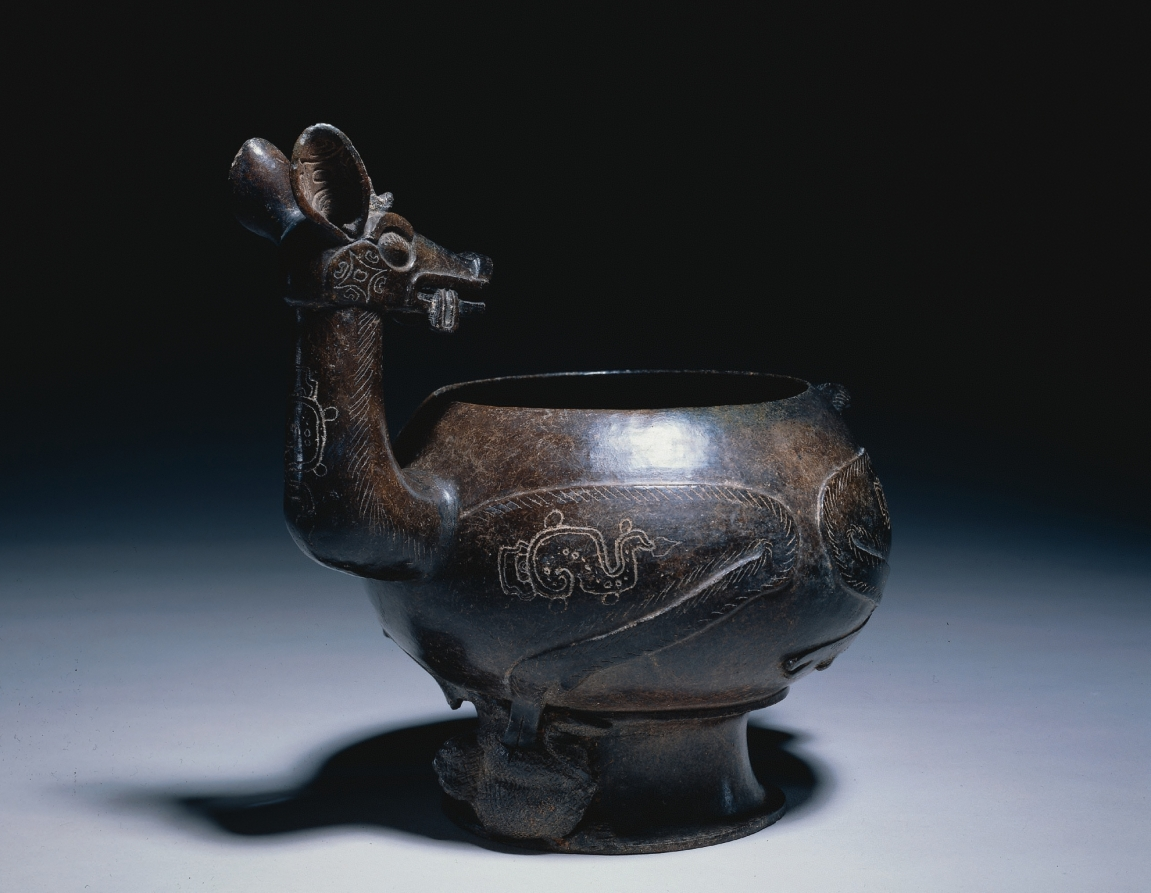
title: Deer Effigy Vessel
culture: Mesoamerica, Maya style, Classic Period (250-900)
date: 250–600 CE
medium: earthenware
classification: Ceramic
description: Maya artwork from the Early Classic Period (about AD 250-600) is dominated by three-dimensional sculpture in jade, stone, wood, and especially ceramic. This vessel is an exceptionally elegant example of Maya blackware, produced by firing earthenware pottery in a reducing (low oxygen) atmosphere. The deer is frequently depicted in Maya art, usually as a victim of either hunting or sacrifice. Venus signs and conch shells engraved on the deer also suggest death, for the planet Venus was regarded as a bringer of ill-fortune, and conch shell trumpets were carried by hunters. The small frog or toad pressed firmly under the deer's hoof relates to agricultural fertility. The croaking of these amphibians was a harbinger of rain.